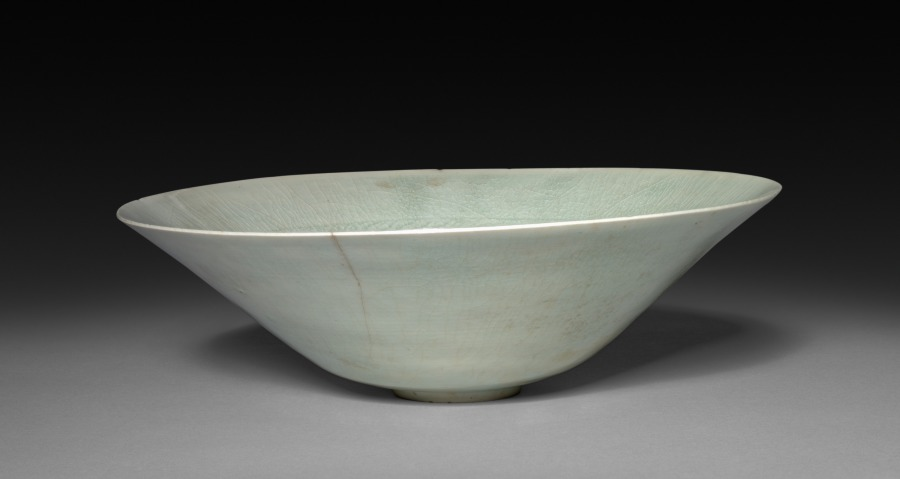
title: Coniform Bowl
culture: China, Song dynasty (960-1279)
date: 960–1279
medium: White porcelain, Yingqing ware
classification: Ceramic